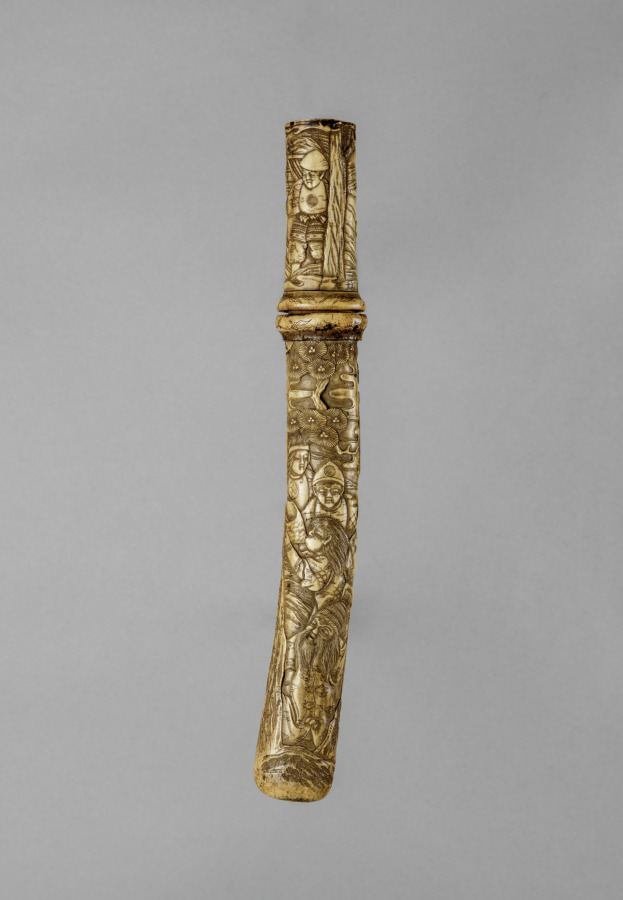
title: Knife with Case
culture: Japan, Edo period (1615–1868)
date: late 1700s-early 1800s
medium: ivory, steel or iron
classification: Arms and Armor